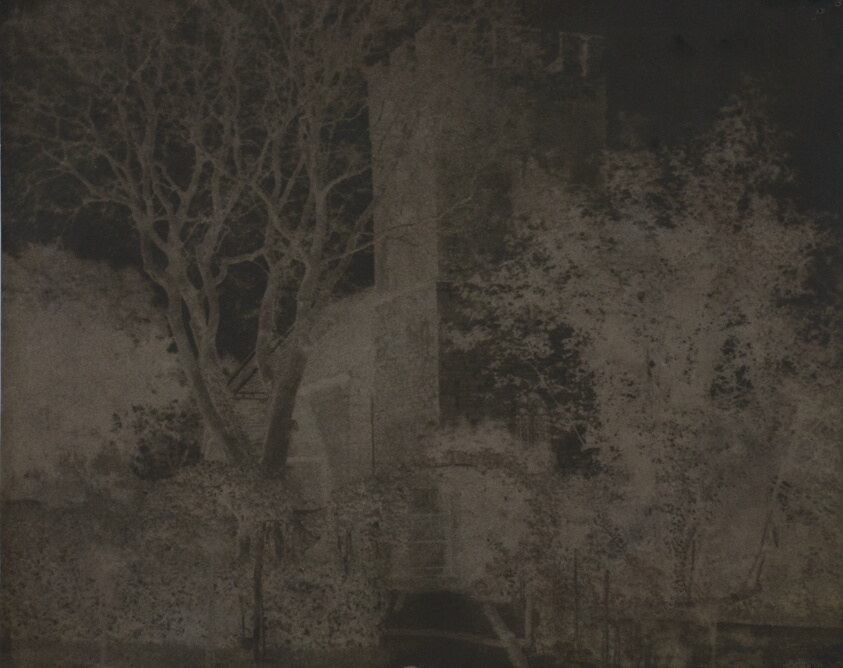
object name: Photograph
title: Untitled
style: 19th century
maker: Artist unknown; probably English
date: 1860s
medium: Calotype negative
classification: photograph; photography